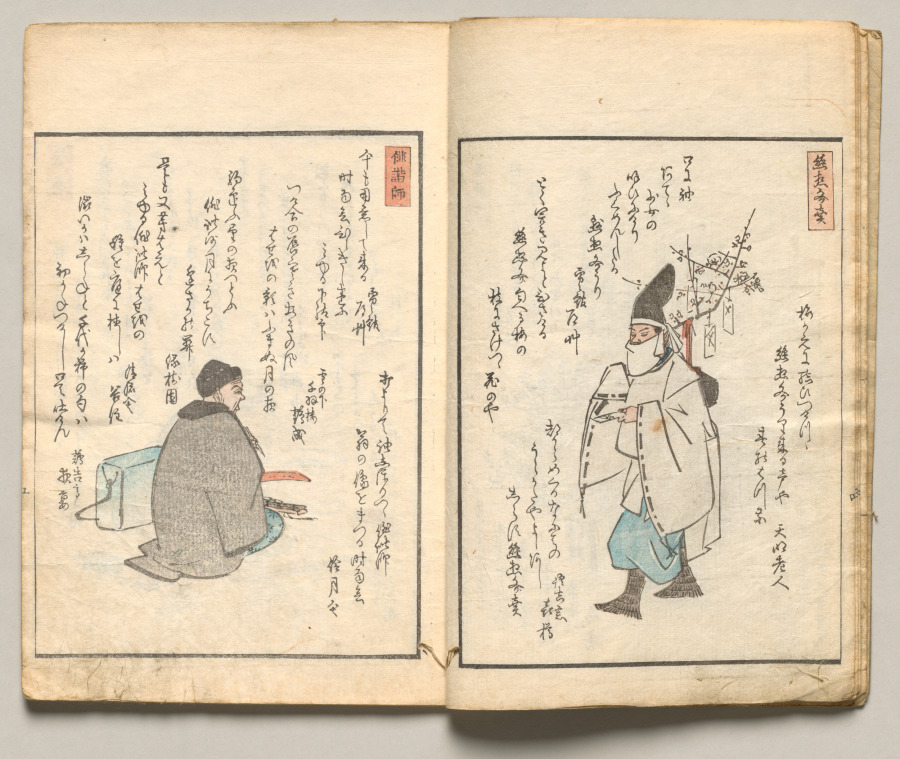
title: Spread Five from Volume Seven of People of Japan in Light Verse (Kyōka)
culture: Japan, Edo period (1615–1868)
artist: Utagawa Hiroshige (Japanese, 1797–1858)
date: 1857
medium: Woodblock-printed book; ink and color on paper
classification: Bound Volume